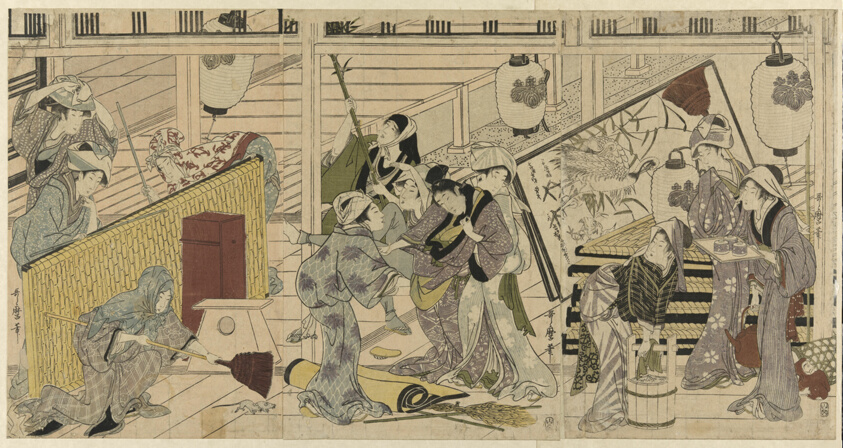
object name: Print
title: House cleaning in preparation for the New Year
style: Japanese (culture or style)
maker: Kitagawa Utamaro 喜多川 歌麿; Japanese, 1753 (?)-1806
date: c. 1797/99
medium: Color woodblock print; three left sheets of oban pentaptych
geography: Japan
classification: woodblock print; print; asian art